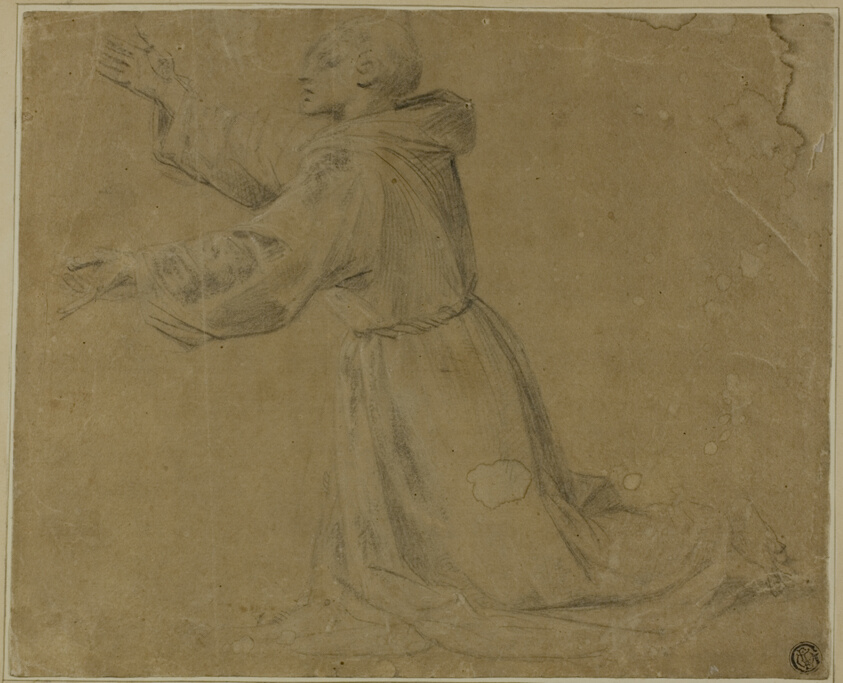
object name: Drawing and Watercolor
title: Kneeling Monastic Saint with Raised Arms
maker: Circle of Giovanni Antonio Sogliani; Italian, 1492-1544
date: 1500/25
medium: Black chalk heightened with traces of white chalk, on tan laid paper, tipped onto cream wove card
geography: Italy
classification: chalk; drawings (visual works); prints and drawing